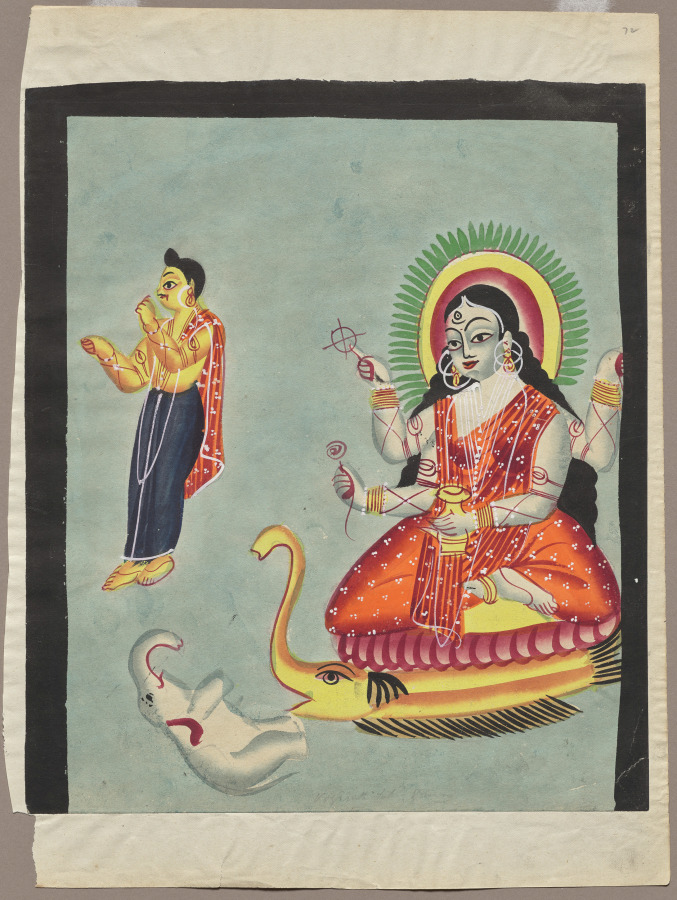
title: The Goddess Ganga, from a Kalighat album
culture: Eastern India, Bengal, Kolkata, Kalighat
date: c. 1890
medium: Gum tempera, graphite, and ink on paper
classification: Painting